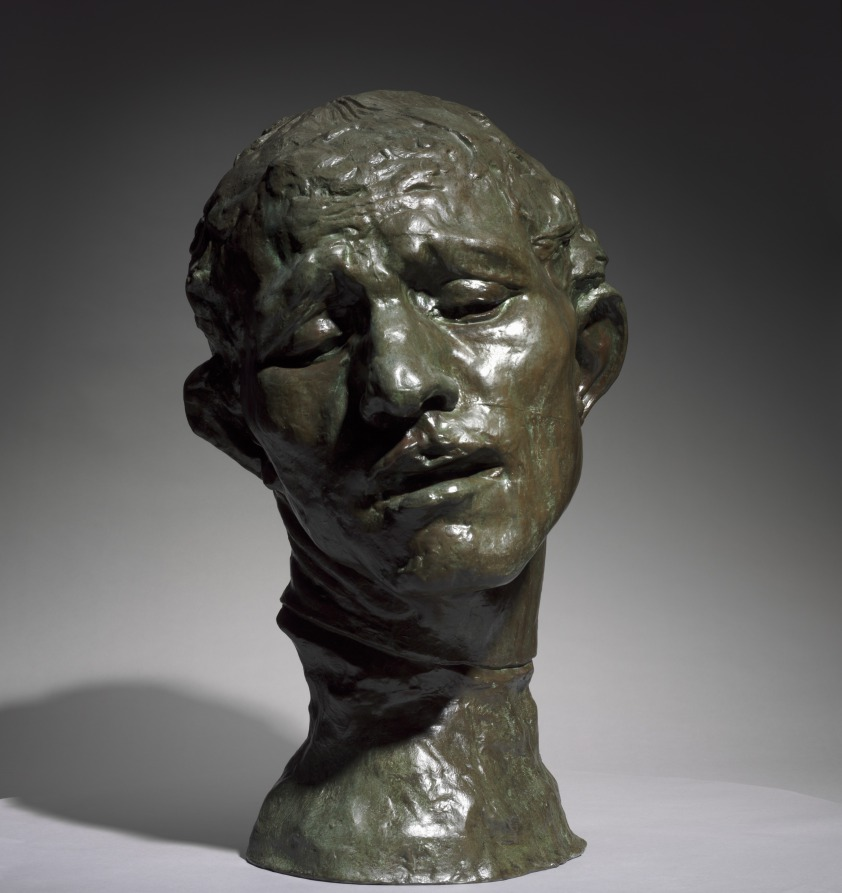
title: Heroic Head of Pierre de Wissant, One of the Burghers of Calais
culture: France, 19th century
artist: Auguste Rodin (French, 1840–1917)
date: 1886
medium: bronze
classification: Sculpture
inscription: inscribed at neck, left: A.Rodin; inscribed lower back: Alexis Rudier/Fondeur-Paris.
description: This sculpture depicts one of the figures in Rodin’s large public monument The Burghers of Calais (1884–89), featuring six French men who volunteered to be taken prisoner by the English in exchange for lifting the siege of Calais during the Hundred Years War (1337–1453). Pierre de Wissant’s anguished expression suggests extreme mental suffering as he contemplates his expected execution. Rodin exhibited a life-size version of the figure as an independent work before completing the monument. He later made multiple versions in various sizes and media.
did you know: This sculpture depicts the head of a figure from Rodin's large public monument The Burghers of Calais (1884-89). The CMA also owns a plaster version of the head.